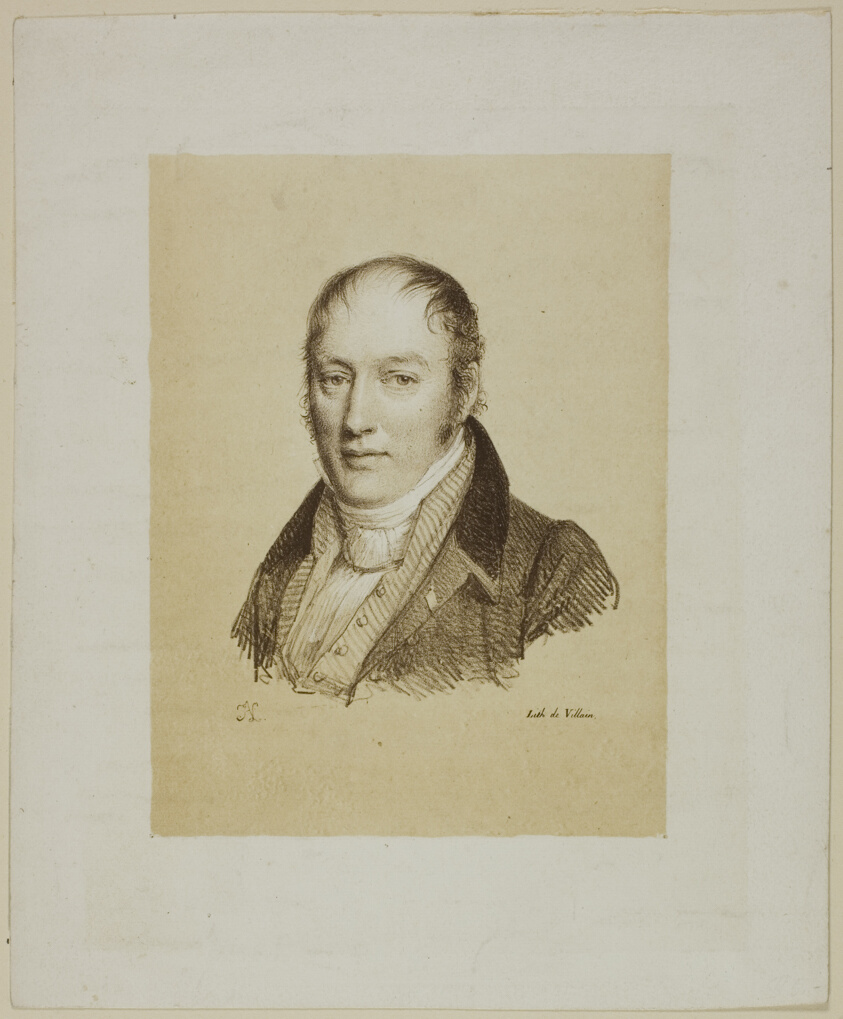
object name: Print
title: Portrait of a Man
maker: Jean Antoine Laurent (French, 1763-1832); François le Villain (French, active 19th century)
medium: Lithograph from two stones, with scraping, on ivory wove paper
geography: France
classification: lithograph; print; prints and drawing